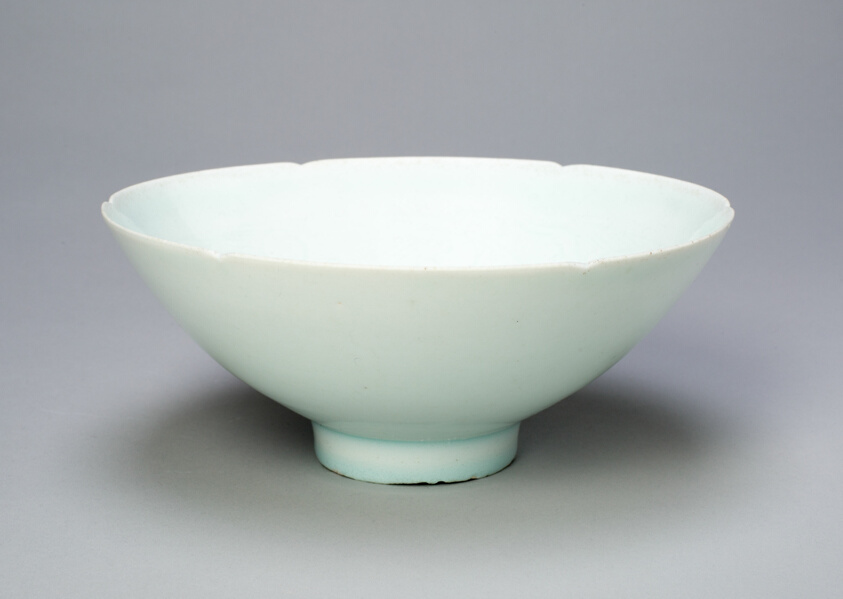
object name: Vessel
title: Foliate Bowl with Peony Scrolls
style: Chinese (culture or style)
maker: China; Jiangxi province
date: Song dynasty (960–1279), 12th/13th century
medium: Qingbai ware; porcelain with underglaze incised and stippled decoration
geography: China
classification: bowl; porcelain; dish (vessel); asian art; ceramics; vessel